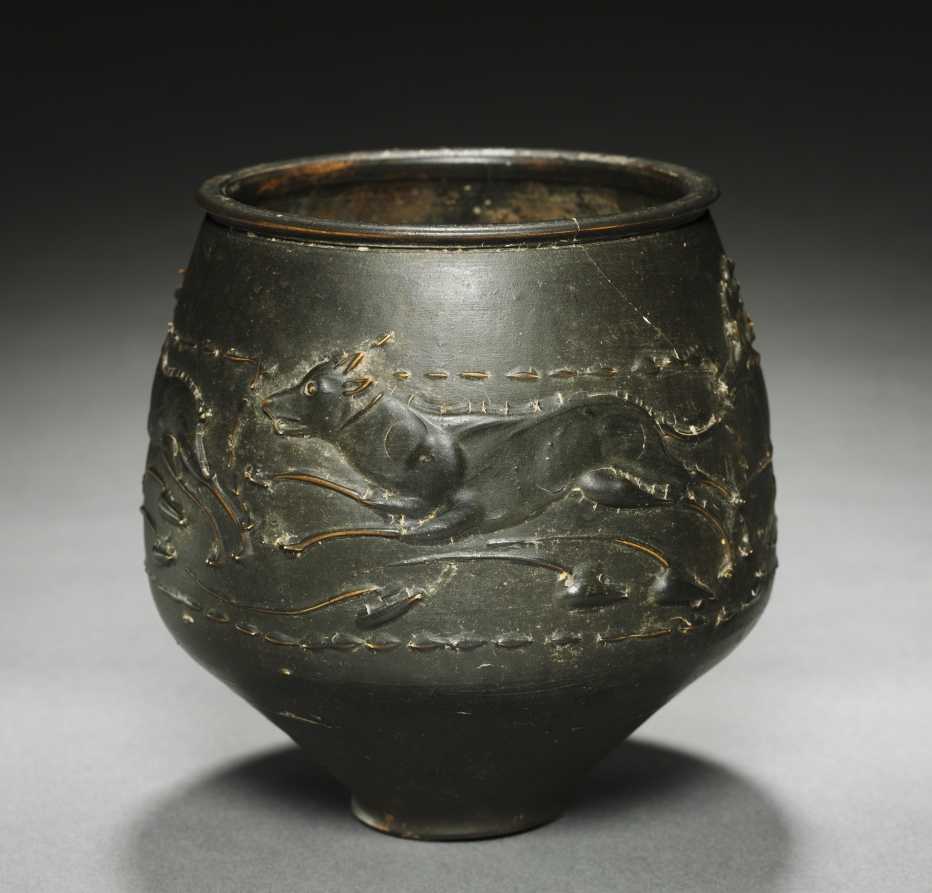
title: "Caster Ware" Vase with Hunt Scene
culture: Rhenish (Cologne), Gallo-Roman, mid-2nd Century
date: mid-100s CE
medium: reddish ware with black burnished slip and Barbotine decoration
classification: Ceramic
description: The wide body of this vase is decorated with a hunting scene in which a stag, doe, hare, and hound chase each other around the vessel. Dotted lines above and below the animals form a border around the scene, though the heads of the creatures occasionally poke above it. While larger barbotine decorations were usually mold made and applied to a leather-hard surface, the figures on our pot were piped on by hand.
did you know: “Hunt cups” like this one were a specialty of artisans working in Roman Cologne during the 2nd century CE.